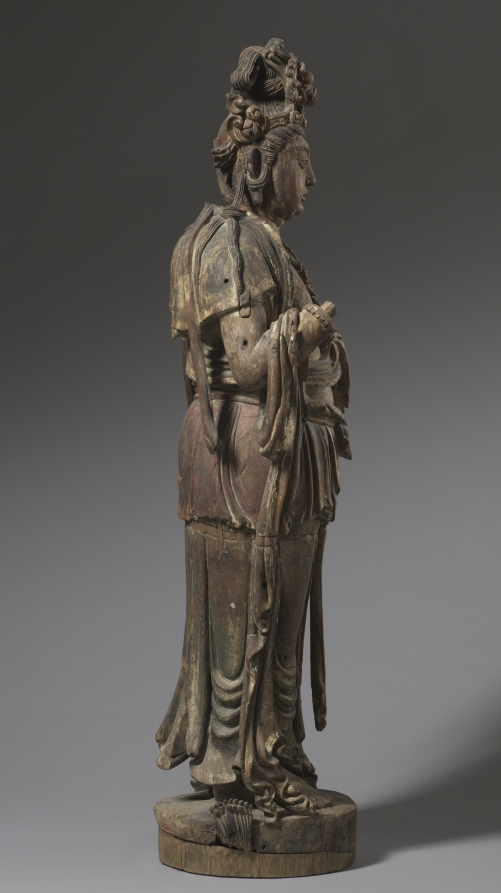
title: Standing Bodhisattva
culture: China, Jin dynasty (1115-1234)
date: 1200s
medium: wood with traces of polychromy and gold leaf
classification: Sculpture